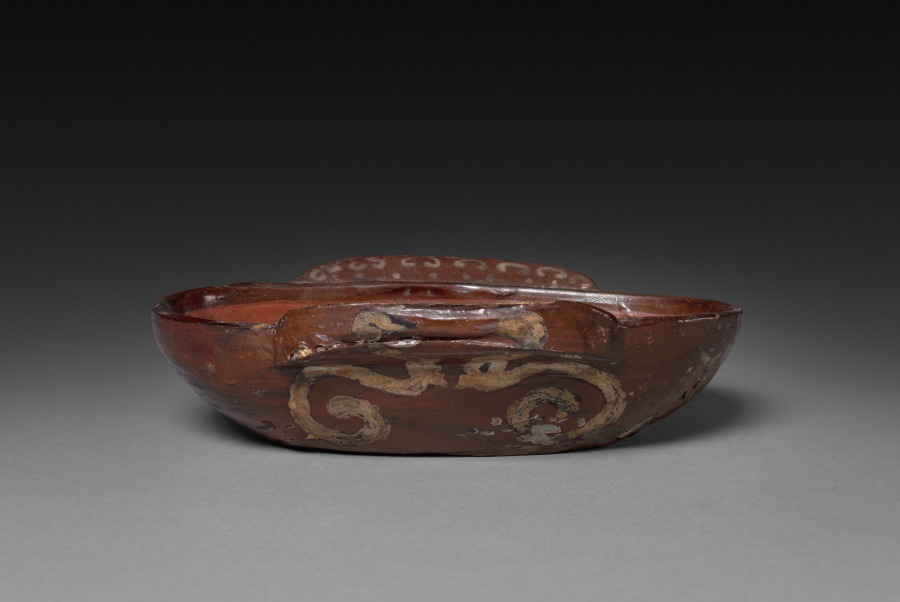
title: Cup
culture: China, Zhou dynasty (c. 1046–256 BCE)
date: c. 600–221 BCE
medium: lacquer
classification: Lacquer